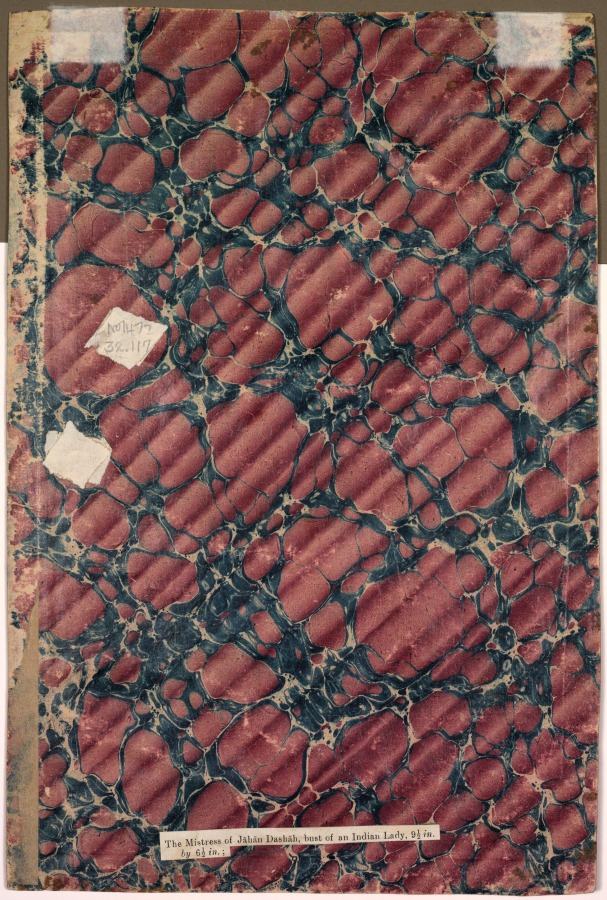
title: Head of a Beauty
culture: India, Mughal school, 18th century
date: c. 1750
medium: Gum tempera, ink, and gold on paper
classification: Painting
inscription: recto, upper center, in Persian: So exquisite that to call you beautiful would be a travesty of the word; it is magic personified that has been exhibited in this painting. Bottom center in Persian: Picture of a beauty.